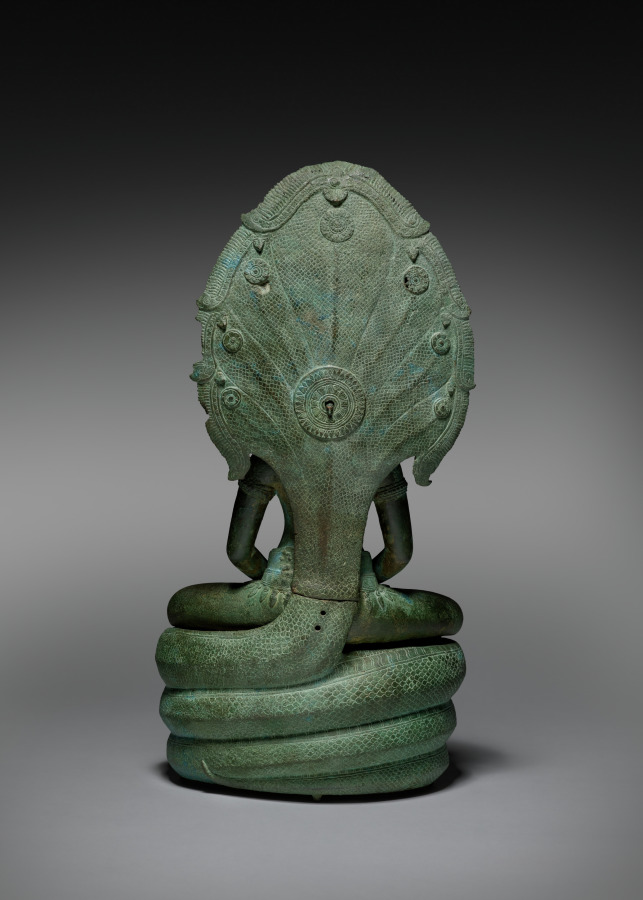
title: Naga-Enthroned Buddha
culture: Cambodia, Angkor, Angkor Wat Period, 12th century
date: 1100s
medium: bronze with traces of gilding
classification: Sculpture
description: Jayavarman VII, who built the great royal temple at Banteay Chhmar, linked himself with the image of the Buddha seated on a serpent, or naga, as the divine form under which he would be honored. During his reign, the naga-enthroned Buddha became a ubiquitous image for veneration, often set up together with Lokeshvara, who was associated with his father, and Prajnaparamita, the form under which his deceased mother was honored. Lokeshvara is the powerful enlightened being of compassion, while Prajnaparmita is the goddess who personifies wisdom. King Jayavarman VII, therefore, presented himself as the enlightened Buddha, the product of the union of Compassion and Wisdom, supported and glorified by the naga, which refers to the Khmer people. Images of the naga-enthroned Buddha have been found at Banteay Chhmar, both in architectural relief sculpture and as icons in the round. After the death of Jayavarman VII, followers of other forms of Buddhism (for example, Theravada) that became prevalent in Cambodia changed the meaning of the naga-enthroned Buddha and reinterpreted the image to refer to a scene from the historical Buddha’s life story in which a serpent protected him from a flood. The crowned and bejeweled aspect of this Buddha, though, indicates that it is another kind of transcendent figure. In his lap his hands are in a posture of meditation, holding what appears to be an offering of ceremonial rice referring to the hope that he will ensure the prosperity of the land.